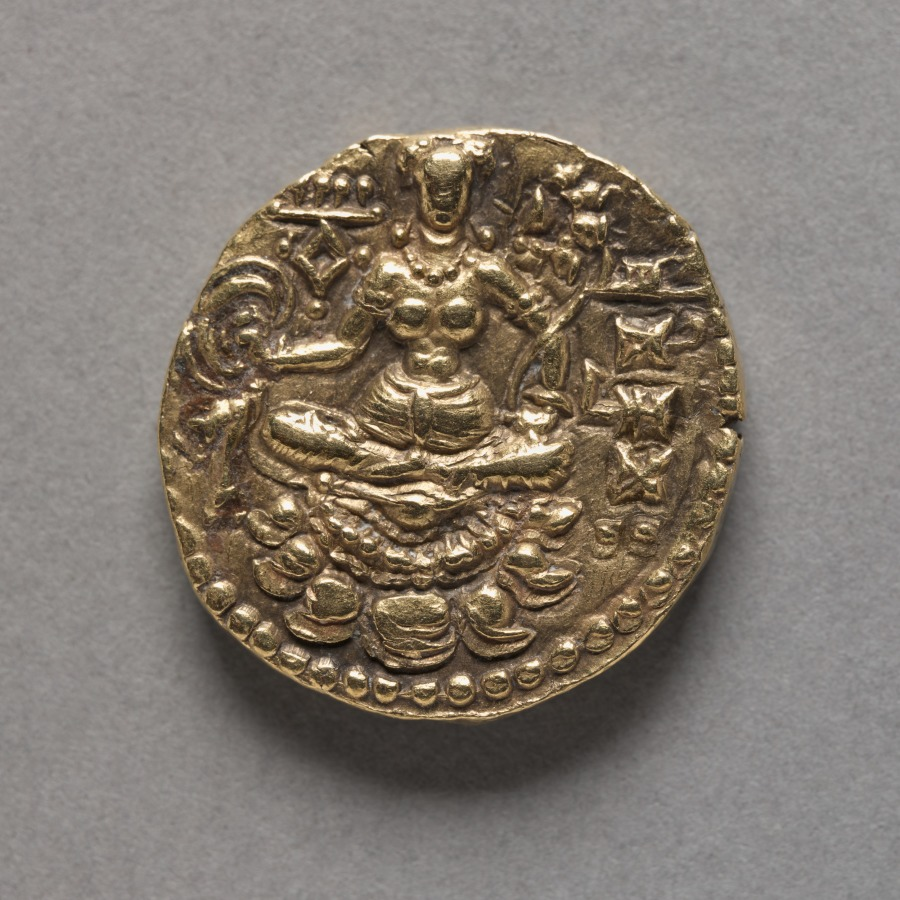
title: Coin with Figure of an Archer (reverse)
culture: India, Chandragupta II, Gupta Period, late 4th-early 5th century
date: c. 400 CE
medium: gold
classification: Coins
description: The rulers of the Gupta dynasty unified northern India under native rule for the first time since the Maurya empire (323-185 bc). The Guptas named themselves after Chandragupta, the founder of the Maurya dynasty. This coin of Chandragupta II, who ruled from around ad 380 to 415, depicts a divine archer holding a bow and arrow. On the reverse is the Indian goddess of good fortune, Shri, seated on a lotus.